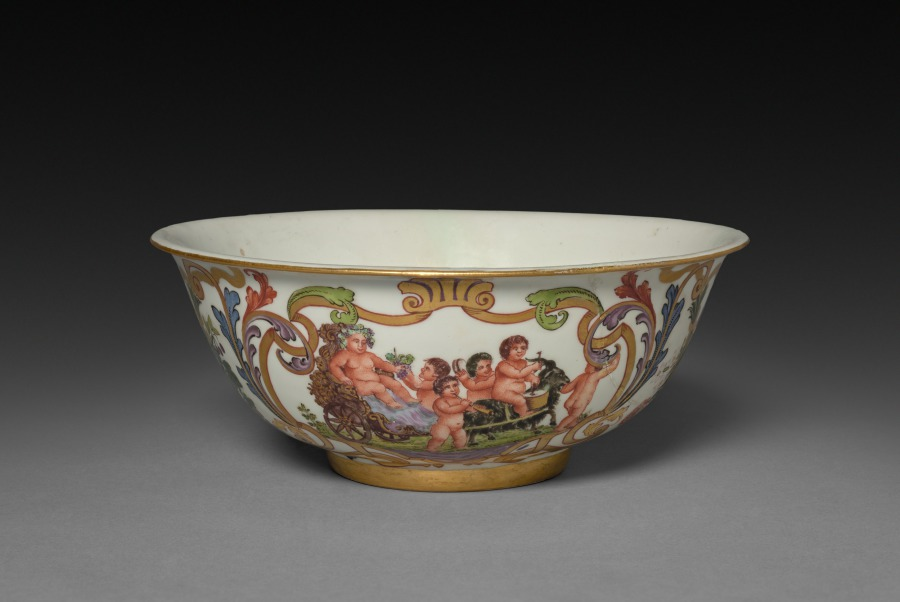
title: Bowl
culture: Austria (?), Vienna (?), 18th century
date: c. 1730–1740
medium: porcelain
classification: Ceramic